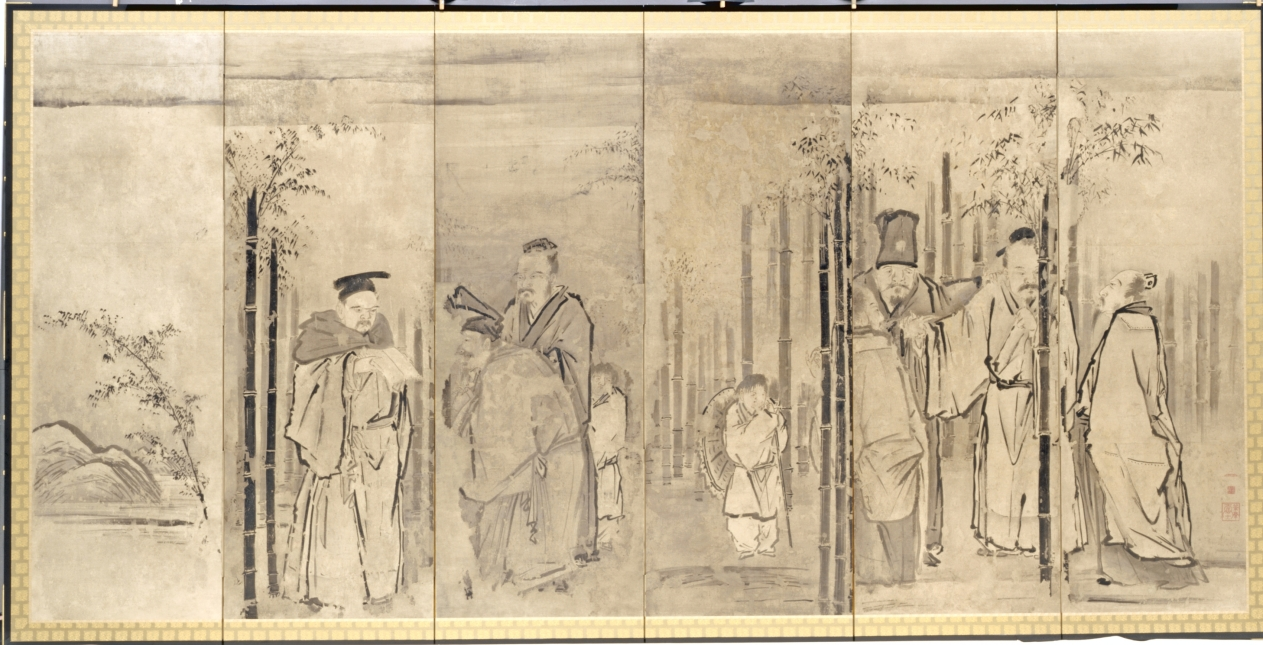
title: Seven Sages of the Bamboo Grove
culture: Japan, Edo period (1615–1868)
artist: Kano Tan’yū (Japanese, 1602–1674)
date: 1600s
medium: pair of six-fold screens; ink on paper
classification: Painting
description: The Kano school was a group of professional artists patronized by the shogun from the late Muromachi period to the Edo period. The group adopted themes of reclusiveness to convey the importance of loyalty to the shogunate. A leader of the Edo Kano school, Kano Tanyu paired Seven Sages of the Bamboo Grove and Four Elders of Mt. Shang to reference a painting of the same theme attributed to Kano Motonobu. Seven Sages of the Bamboo Grove refers to the elites who escaped the social chaos of China’s Wei-Jin period (AD 200s–400s); they fled to a secluded bamboo grove where they could express themselves freely, enjoying pure conversation, music, and wine. The other screen, Four Elders of Mt. Shang, depicts the scholars who left the turbulence of the late Qin dynasty to pursue their scholarly interests in seclusion on Mt. Shang in Shanxi province.